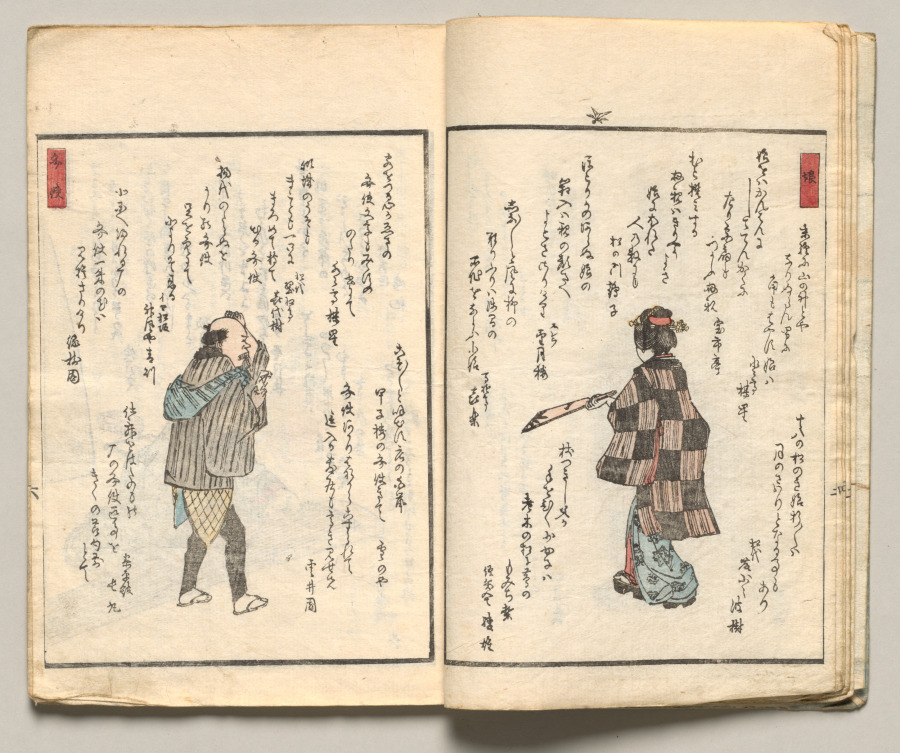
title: Spread Six from Volume Six of People of Japan in Light Verse (Kyōka)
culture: Japan, Edo period (1615–1868)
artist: Utagawa Hiroshige (Japanese, 1797–1858)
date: 1857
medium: Woodblock-printed book; ink and color on paper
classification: Bound Volume